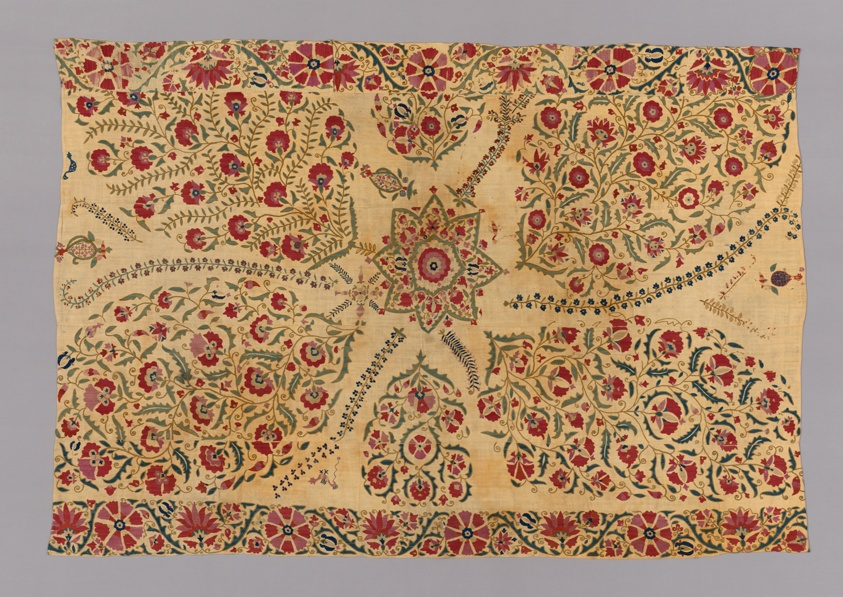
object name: Textile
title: Cover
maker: Uzbekistan, Bukhara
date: 19th century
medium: Cover with floral design embroidered in colors.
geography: Uzbekistan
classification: textile; weaving